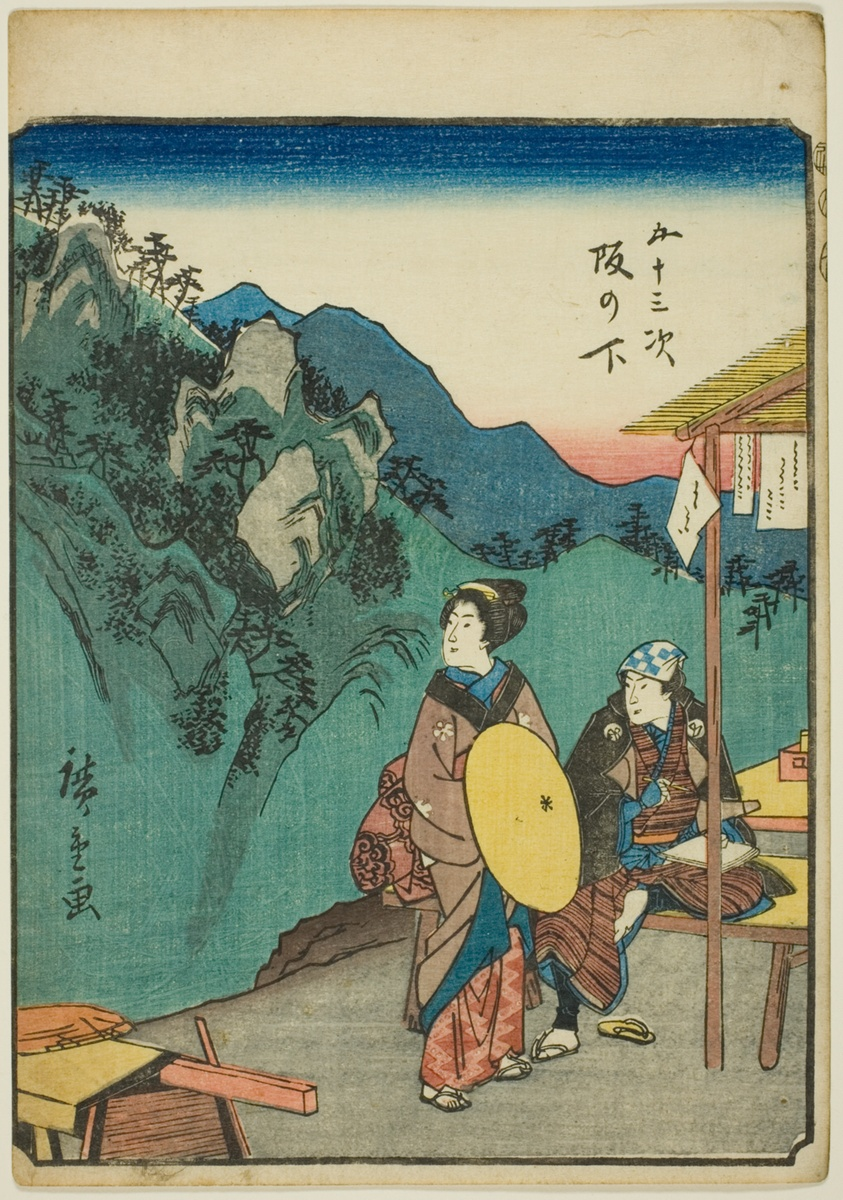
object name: Print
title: Sakanoshita, from the series "Fifty-three Stations [of the Tokaido] (Gojusan tsugi)," also known as the Figure Tokaido (Jinbutsu Tokaido)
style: Japanese (culture or style)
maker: Utagawa Hiroshige 歌川 広重; Japanese, 1797-1858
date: 1852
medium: Color woodblock print; chuban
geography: Japan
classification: woodblock print; print